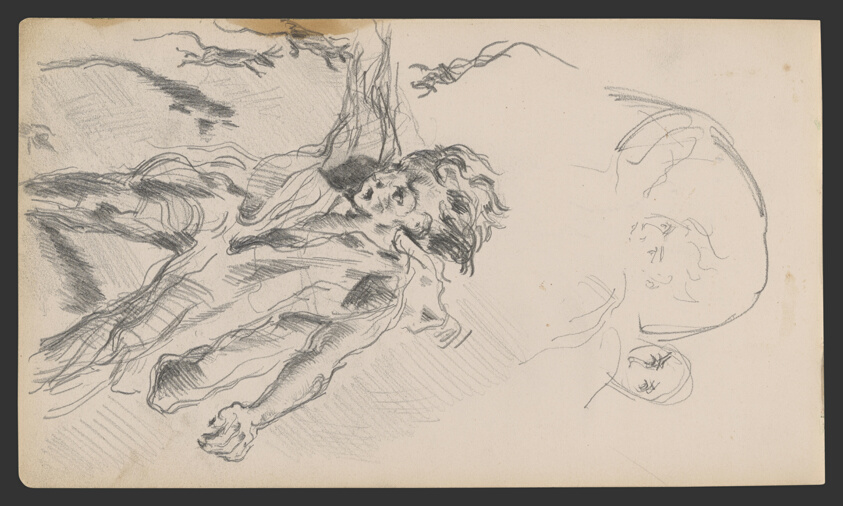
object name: Drawing and Watercolor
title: Sketchbook No. 2 (L'Estaque)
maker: Paul Cézanne; French, 1839-1906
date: 1875–86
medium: Graphite and pen and ink drawings on paper, bound into a book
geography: France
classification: sketchbook; graphite; prints and drawing; paper